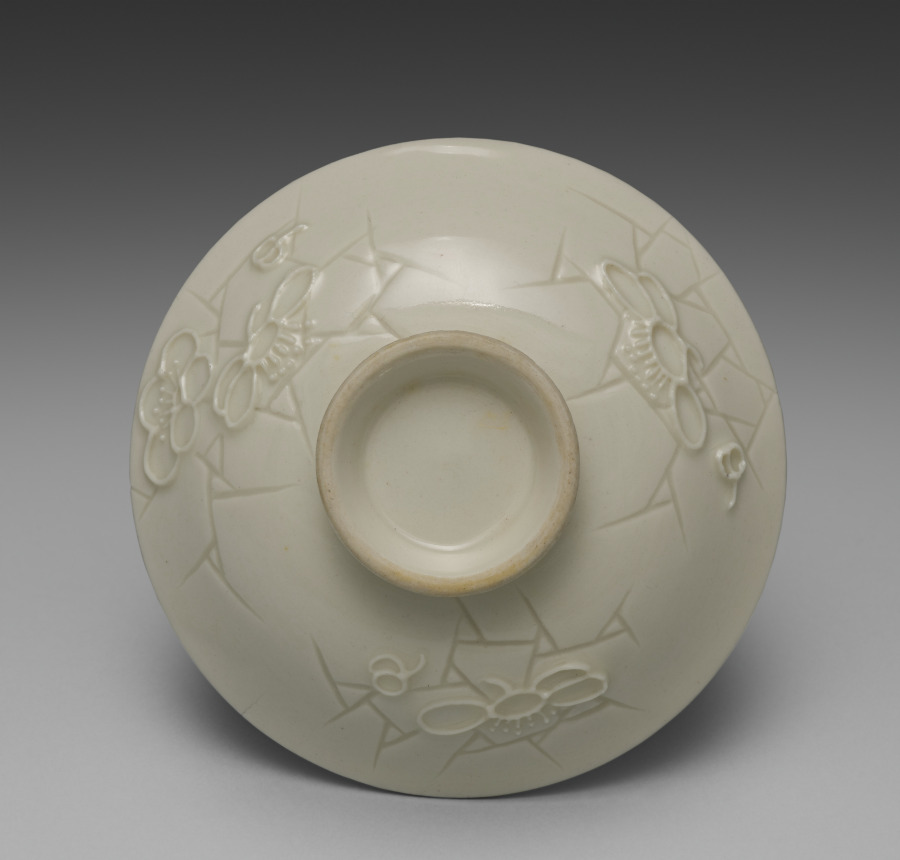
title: Cover for a Bowl from Dining Set with Plum Blossoms and Cracked-Ice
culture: Japan, Meiji period (1868–1912)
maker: Seifū Yohei II (Japanese, 1844–1878)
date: c. 1875–78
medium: Porcelain with molded designs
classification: Ceramic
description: Each item in this set has a delicate low-relief design of flowering plum branches over scattered, intersecting lines meant to resemble the cracked-ice surface of a frozen body of water and is signed on the base in gold pigment. While Yohei II produced many fine works in underglaze blue, like those produced by Kiyomizu Shichibei, he also made works in quite different styles later in his career, from the early 1870 s. In 1873, he was appointed purveyor to the Industrial Center of Kyoto Prefecture, a designation associated with Kyoto’s efforts to reach an international market through the port of Kobe; and from 1875 until his death, he was involved in national-level projects to present Japanese ceramics across the world. It was during this period that Yohei III was apprenticed to Yohei II, and it has been suggested that this set may in fact be an early example of Yohei III’s work, which he signed with his teacher’s name. Decorated with flowers resembling Japanese textile motifs, the set calls to mind the design of Yohei II’s pair of vases with plum blossoms in the Victoria and Albert Museum. Here, the elaborate trees created for a formal public exhibition setting have been translated into the approachable blossoms of the genteel domestic environment. While the designs are consistent across the pieces, each raised flower petal and pistil and each incised line in the ice was done by hand, so the cups, bowls, and dishes are similar yet unique. The bottoms of two boxes once identified the set’s owner, but the information has been deliberately obscured with black ink. However, inscriptions still visible appear to indicate two occasions, once at the end of July 1886 , and once again in June 1916 , when parts of the set were requested from Hokura in Niigata Prefecture. The location corresponds to a neighborhood in the present-day city of Jōetsu. The surname Tsuji 辻 also appears on a paper tag affixed to one of the box cloths. Future research may possibly reveal more about their provenance. A vase by Yohei III in a private collection combines the formal grandeur of the Yohei II vases in the Victoria and Albert Museum with the gentler design of this dining set, placing flowering plum trees against soft, scalloped-edge clouds resembling those in golden screens.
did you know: The dining wares have a creamy white coloration that the four boxes containing them identify as Korean in style.